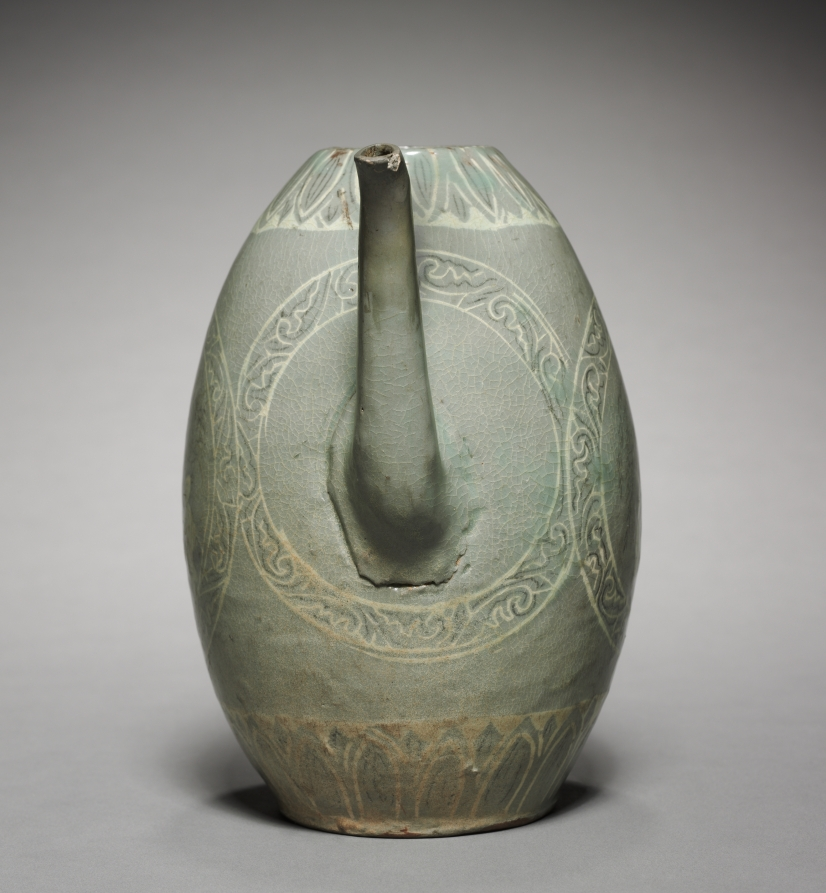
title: Pitcher with Inlaid Figure and Willow Design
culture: Korea, Goryeo dynasty (918–1392)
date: 1200s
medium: celadon ware with inlaid white and black slip decoration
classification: Ceramic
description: Representations of the elite’s elegant gatherings also appear on craft art designs, particularly depictions of the four accomplishments celebrated as cultivated pastimes by the scholar-literati elite—that is, playing stringed instruments and chess, and practicing calligraphy and painting. The image on this rare Korean inlaid celadon of two figures sitting together under a tree is comparable to renderings featuring the accomplishment motif of playing chess, or baduk in Korean.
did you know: As one of the oldest board games invented in China, this East Asian chess is still played in international competition venues.